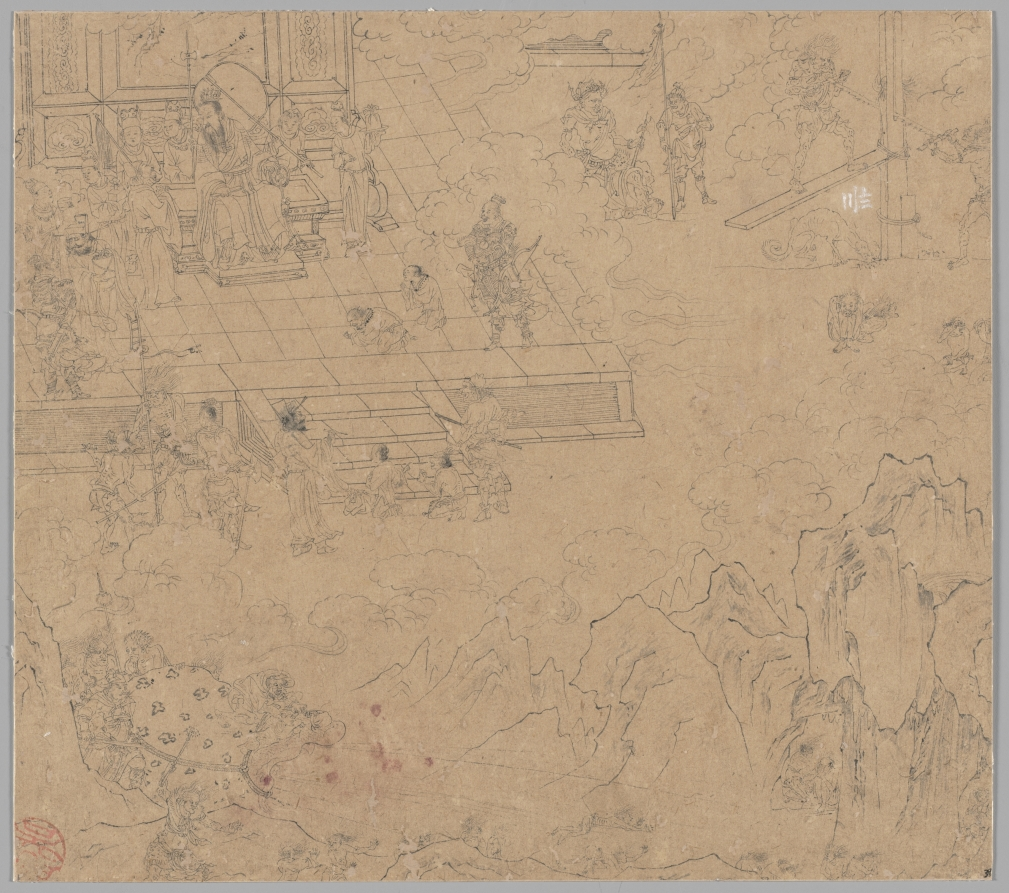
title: Album of Daoist and Buddhist Themes: Kings of Hells: Leaf 39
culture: China, Southern Song dynasty (1127-1279)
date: 1200s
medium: Album, ink on paper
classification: Painting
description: This extraordinary album has 50 paintings on a variety of religious subjects. They were likely created by several master craftsmen to share with studio apprentices as models for fulfilling commissions. The Jade Emperor and the Daoist pantheon make up the first 26 leaves. The next 14 leaves portray the Buddhist Ten Kings of Hell administering punishments to the dead. The third section, called “Clearing the Mountains,” features divine soldiers, led presumably by the deity Erlang Shen 二郎神, fighting undesirable creatures.